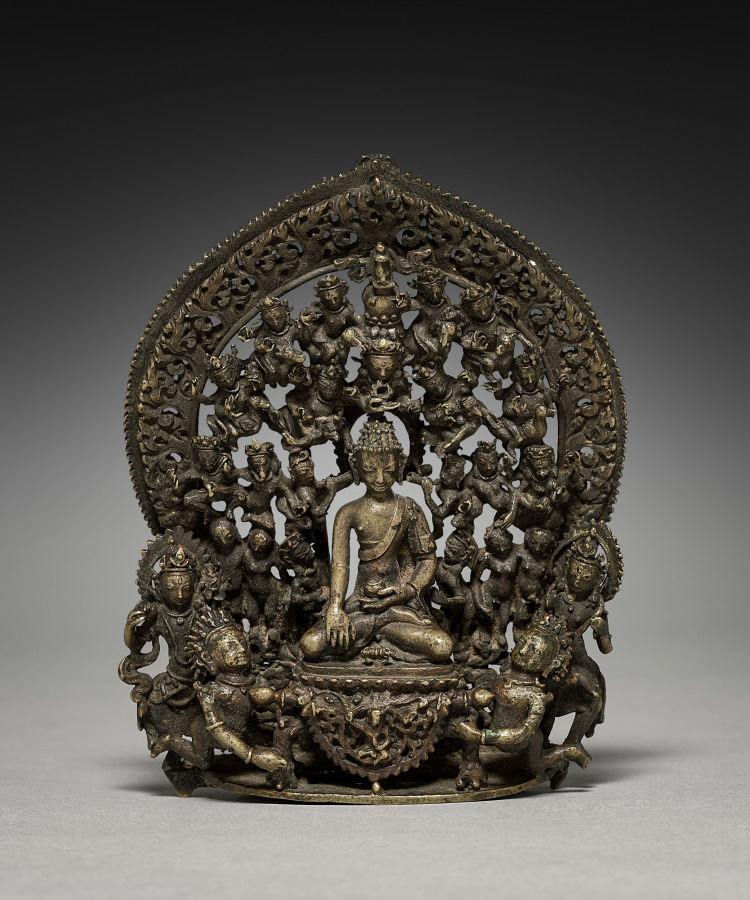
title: Triumph of the Buddha, Marvijaya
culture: Nepal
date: 1400s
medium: bronze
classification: Sculpture